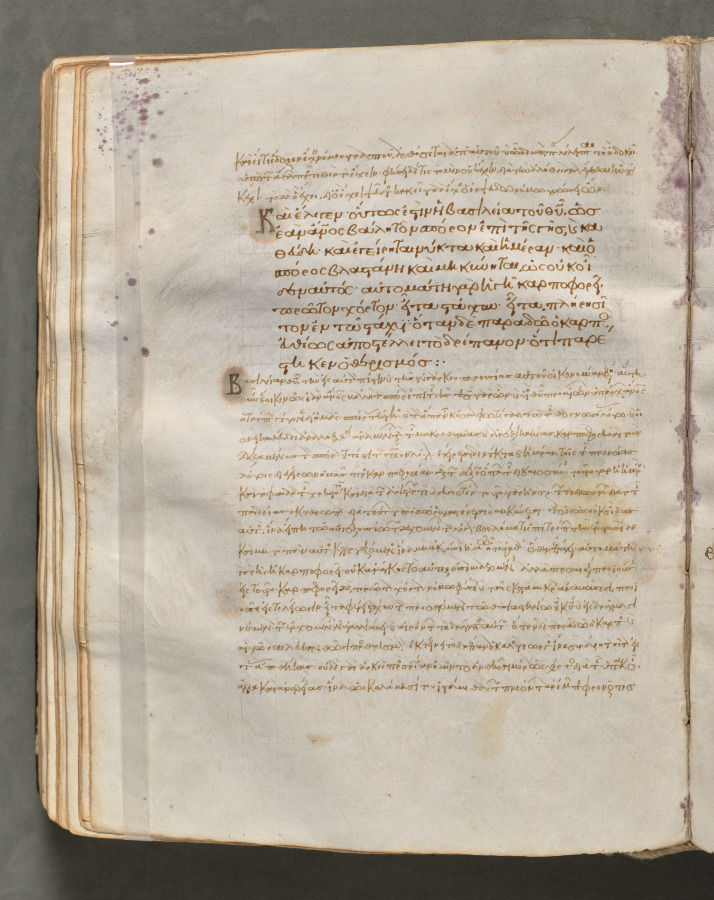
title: Text, folio 145 (verso), from a Gospel Book with Commentaries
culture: Byzantium, Constantinople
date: c. 1000–1100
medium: ink, tempera, and gold on vellum; leather binding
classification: Bound Volume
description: Each of the four gospels in this book opens on a page with brilliantly illuminated borders depicting the author of the text as well as birds-principally peacocks, symbols of the immortality of the soul-and fountains, representing the fountain of life and the salvation of the soul. This volume consists of 428 leaves with texts in Greek. Its level of sophistication suggests that it was probably written and decorated in a monastery in Constantinople.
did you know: Gospel Books were carried in procession through Byzantine churches.